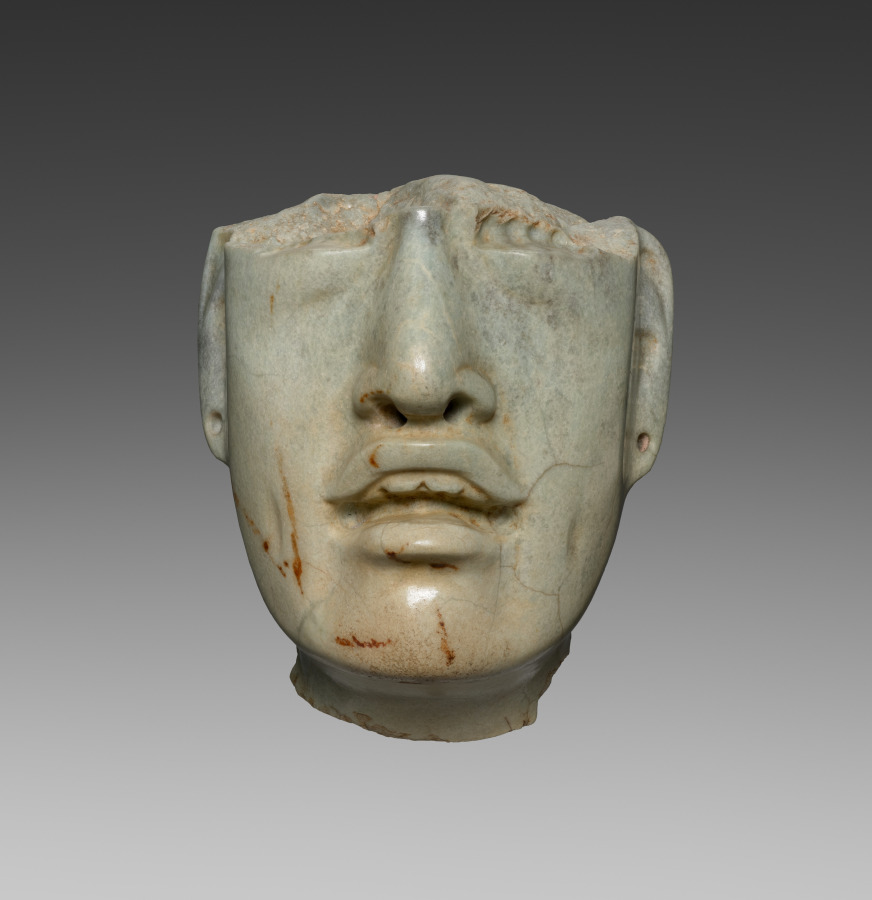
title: Head Fragment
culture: Mesoamerica, Mexico, Olmec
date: c. 900–300 BCE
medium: jadeite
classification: Jade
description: This sensual head fragment may come from a seated or standing figure like those shown nearby, though much larger. The carving is exceptionally fine, from the slight under-eye puffiness to the delineation of the fleshy lips and the teeth. The profile face of supernatural being is incised just in front of each ear, perhaps indicating that the subject had special power.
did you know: In ancient Mesoamerica, jade was more valuable than gold.